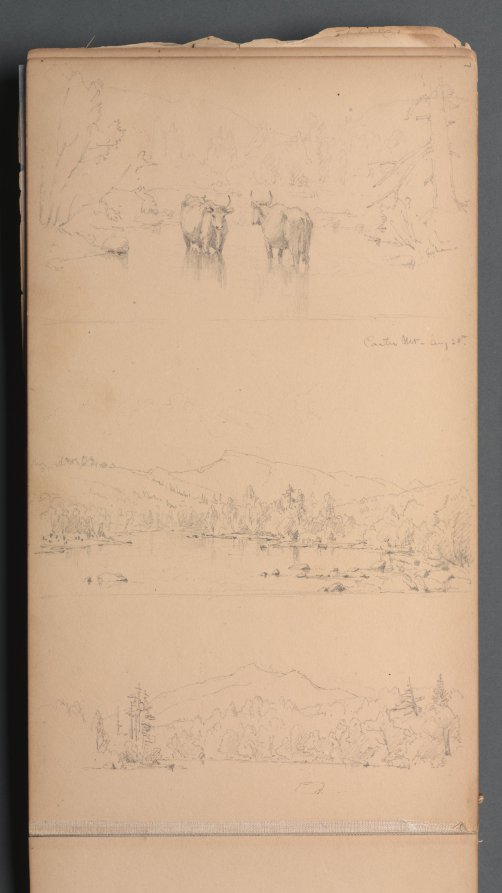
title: Sketchbook, page 07: "Carter Mt (?) Aug. 28th"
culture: America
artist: Sanford Robinson Gifford (American, 1823–1880)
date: 1859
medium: graphite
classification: Bound Volume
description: Gifford was an American landscape painter belonging to the second generation of Hudson River school artists. Based in New York City with a studio at the Tenth Street Studio Building, Gifford took annual summer trips to the Catskills, the Adirondacks, and other scenic locations in New England. This sketchbook accompanied the artist on his expedition in 1859 to New Hampshire and Maine, where he drew sites such as Dixville Notch, the White Mountains, and Peaks Island, Casco Bay. Gifford used such graphite studies as the basis for oil paintings worked up in his studio, such as A Home in the Wilderness (1866).